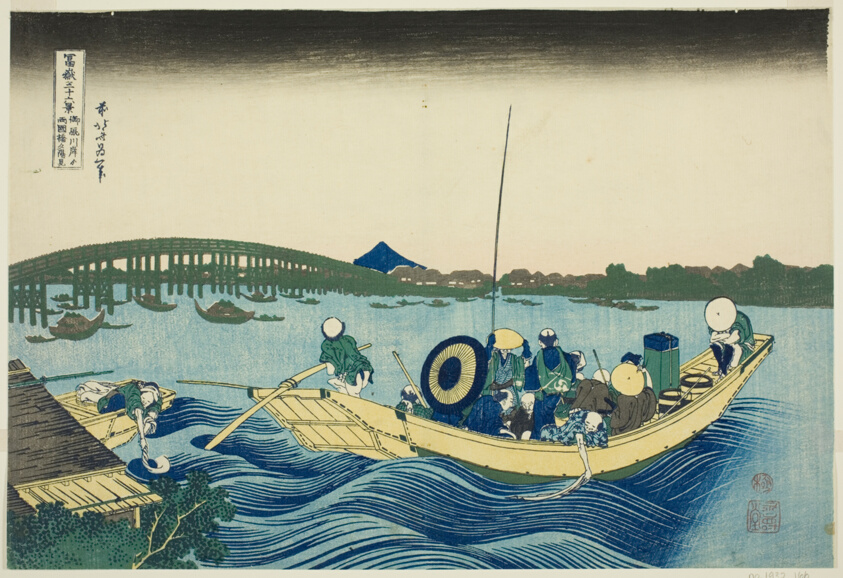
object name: Print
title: Viewing Sunset over the Ryogoku Bridge from the Onmaya Embankment (Onmayagashi yori Ryogokubashi sekiyo o miru), from the series "Thirty-six Views of Mount Fuji (Fugaku sanjurokkei)"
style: Japanese (culture or style)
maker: Katsushika Hokusai 葛飾 北斎; Japanese, 1760-1849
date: c. 1830/33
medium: Color woodblock print; oban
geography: Japan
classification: woodblock print; print; asian art